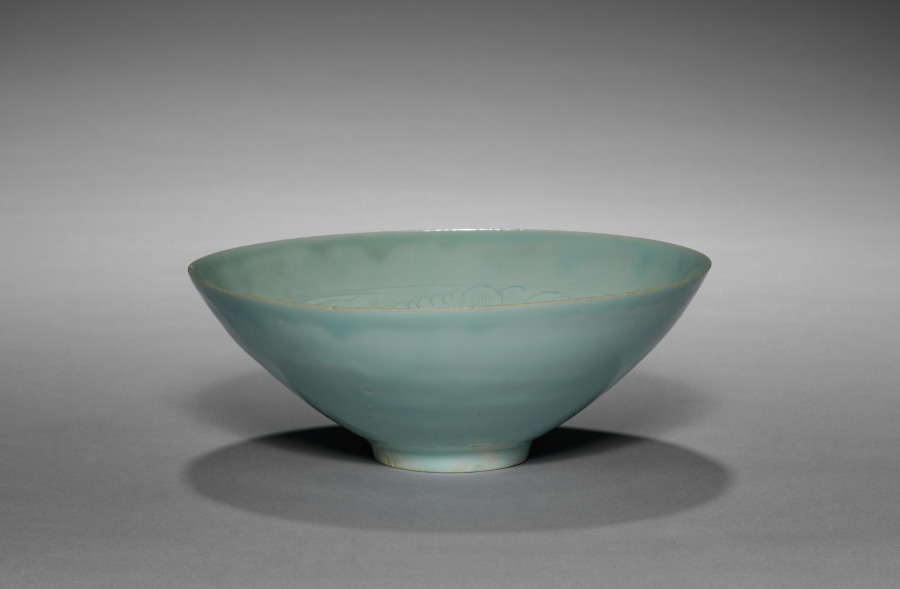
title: Bowl with Carved Design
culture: South China, Southern Song dynasty (1127–1279)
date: 1100s–1200s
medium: Porcelain with pale bluish-white (qingbai) glaze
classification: Ceramic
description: This conical bowl and the shallow and wide one (CMA 2020.183) are both hand-incised with decoration suggesting waves, clouds, or floral sprays. All of these motifs had auspicious meaning: waves and clouds bring rain that fertilizes the fields, and flowers and plants were often associated with the beauty of human virtues. The carved and combed designs were swiftly cut with a wooden tool into the unfired leather-hard body before glazing. Once the glaze was applied, it pooled in the incised areas rendering the design more visible.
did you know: Never intended for imperial use, qingbai ware was among the first mass-produced porcelain types and became a popular export.